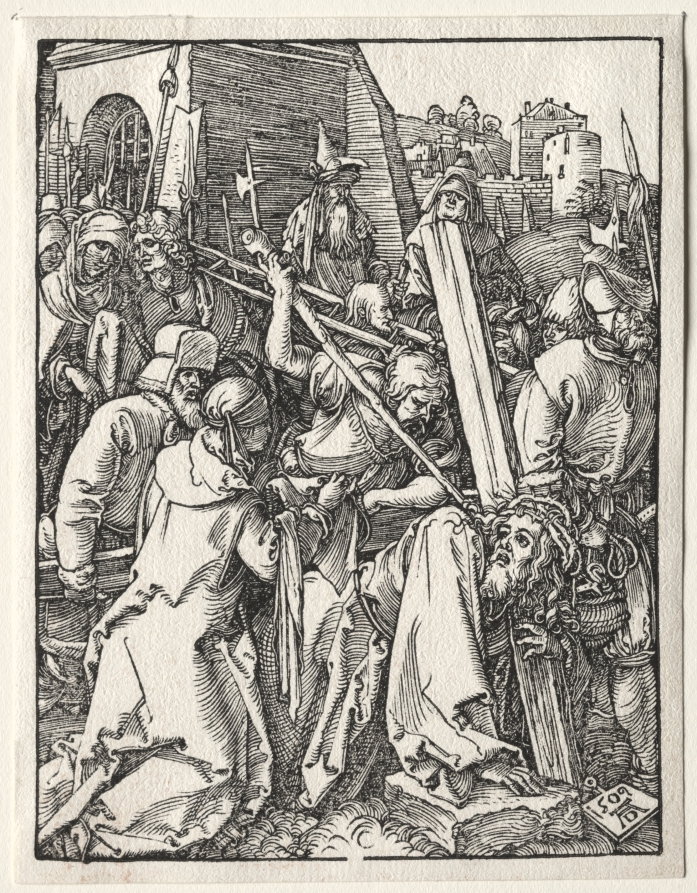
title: The Small Passion: Christ Bearing the Cross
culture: Germany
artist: Albrecht Dürer (German, 1471–1528)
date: 1509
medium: woodcut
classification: Print